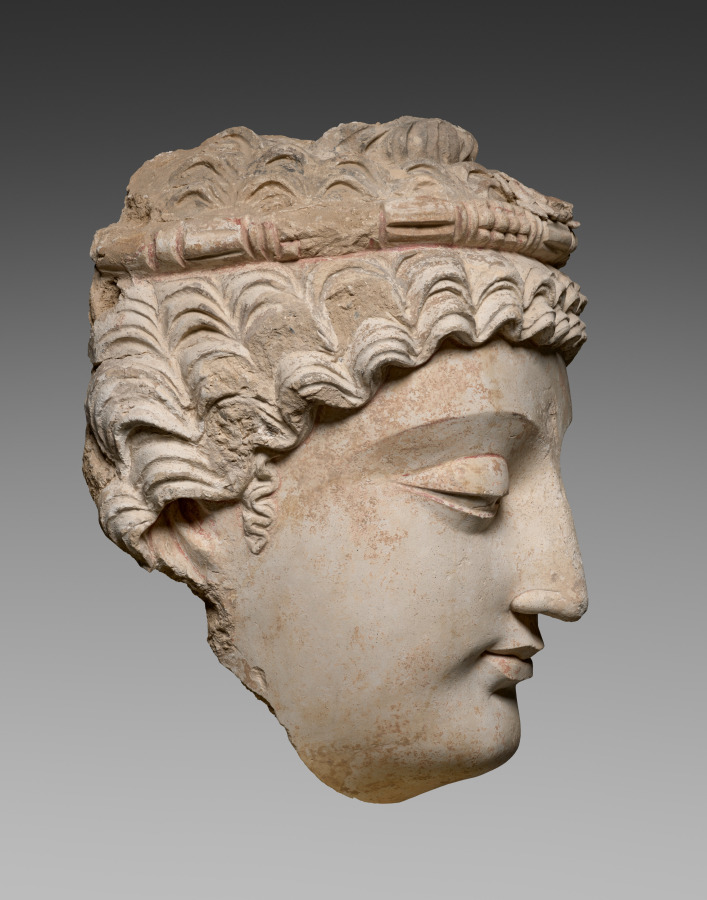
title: Head of Bodhisattva Avalokiteshvara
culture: Afghanistan or Pakistan, Gandhara, Kushan period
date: 300s–400s CE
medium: stucco with traces of paint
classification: Sculpture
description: By this period, individual bodhisattvas were beginning to be revered as ideal figures who would deliberately postpone their own enlightenment and entrance into final nirvana, which is a state from which no one returns to be reborn into this world. Bodhisattvas accomplish all but the final meditation leading to full enlightenment, but they are considered to be so advanced in their practice and realization that they have the ability to control their rebirth and act in righteous and compassionate ways to help others achieve enlightenment. Because the remains of a lotus pedestal on which a Buddha sat is at the center of the diadem, this head can be identified as that of the Bodhisattva of Compassion. The idealized linearity of the brows and eyes along with the formalized waves of hair give an ethereal quality to the otherwise naturalistic face.